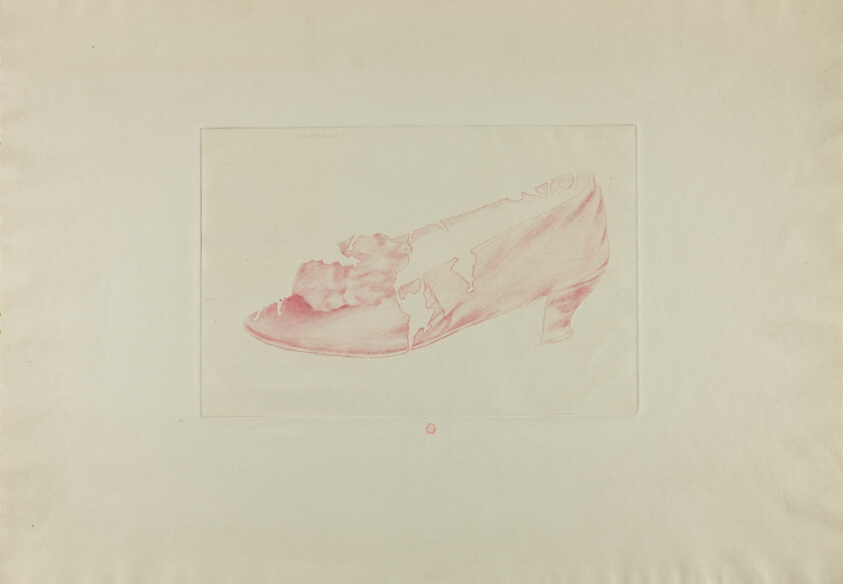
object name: Print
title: The Assault of the Shoe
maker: Henri Charles Guérard (French, 1846-1897)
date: 1888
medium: Etching, with open bite, in light red on cream wove paper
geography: France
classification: etching; paper; print; prints and drawing